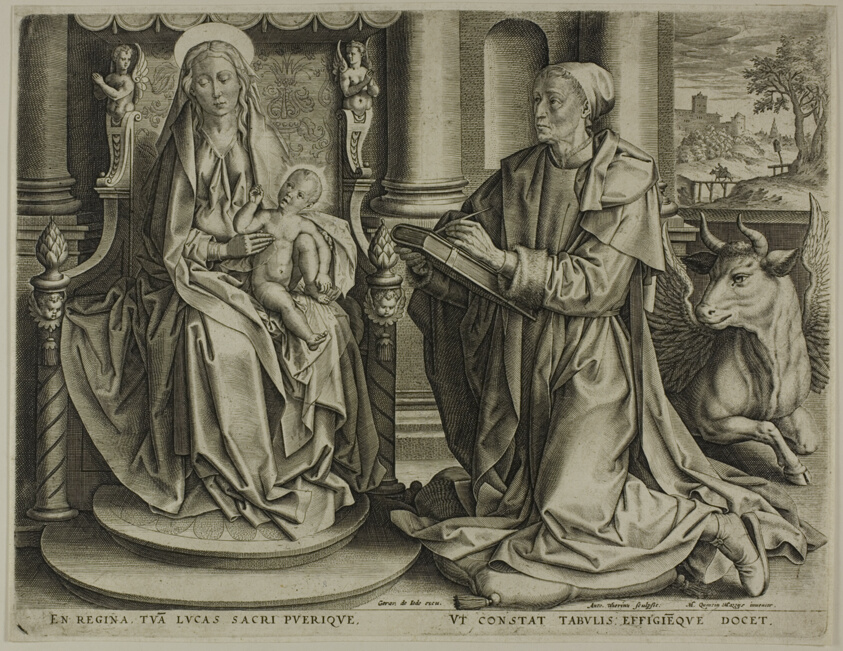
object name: Print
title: Saint Luke Painting the Virgin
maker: Anton Wierix II (Flemish, 1555-1604); after Quentin Matsys (Netherlandish, 1466-1530)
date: c. 1580-90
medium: Engraving in black on off-white laid paper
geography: Flanders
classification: engraving; print; prints and drawing